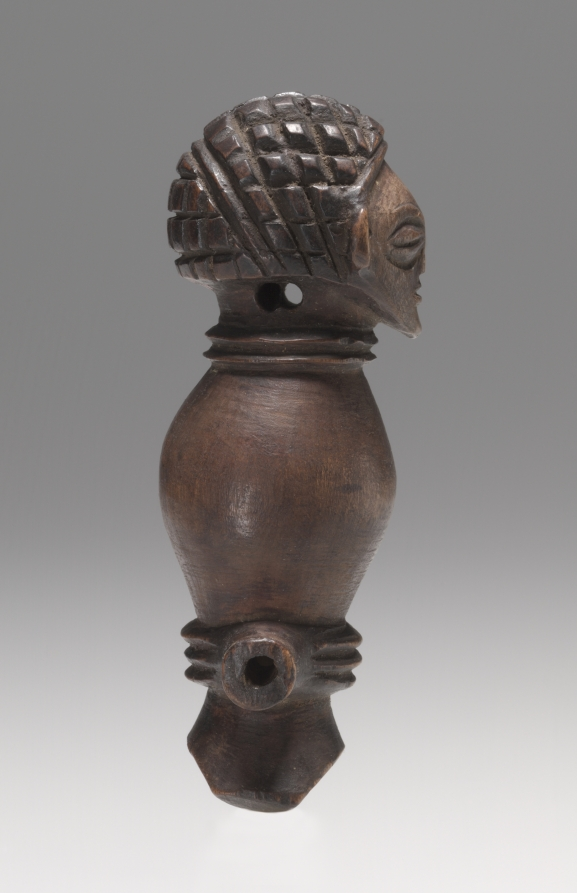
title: Whistle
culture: Central Africa, Democratic Republic of Congo or Angola, Chokwe people, late 19th century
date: late 1800s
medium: Wood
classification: Musical Instrument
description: Carved out of ivory or wood in a variety of shapes, Chokwe whistles often bear miniature, stylized renderings of masks. Cikunza, the "patron saint" of the boys' initiation into manhood, is depicted with a pointed extension imitating the horn of a road antelope, symbolizing the fertility spirit. Typically such whistles were used by men during the hunt to communicate with their co-hunters and to call their dogs. They were either worn attached to a string as a necklace or tied to a spear.